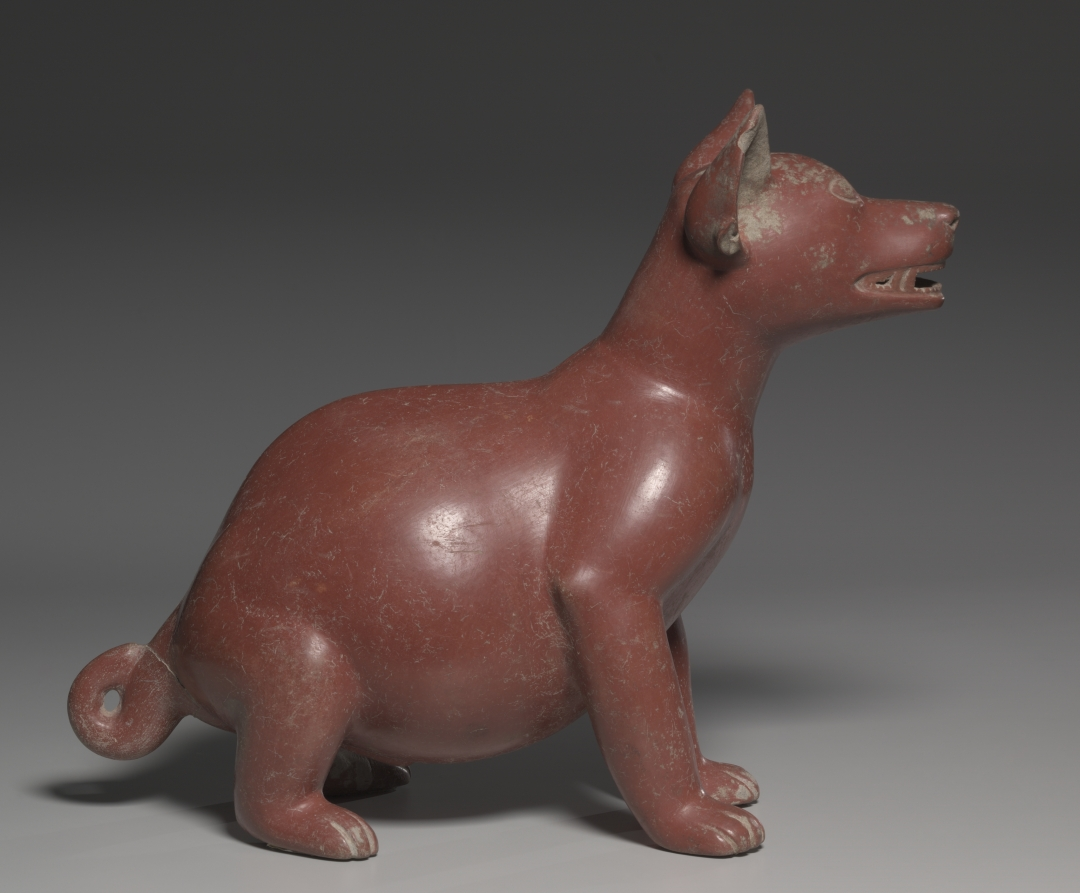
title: Male Dog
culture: West Mexico, Colima, Comala style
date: 200 BCE–300 CE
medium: earthenware with burnished red slip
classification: Sculpture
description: One of the best-known subjects of West Mexican tomb sculpture is the native hairless dog, which is shown naturalistically-as here-but also wearing a human mask, signaling complex meanings.These meanings are not well-understood, but like later Mesoamericans, West Mexicans may have believed that dogs served as guides or guards in the underworld realm of the dead. For the living, they also served as food.